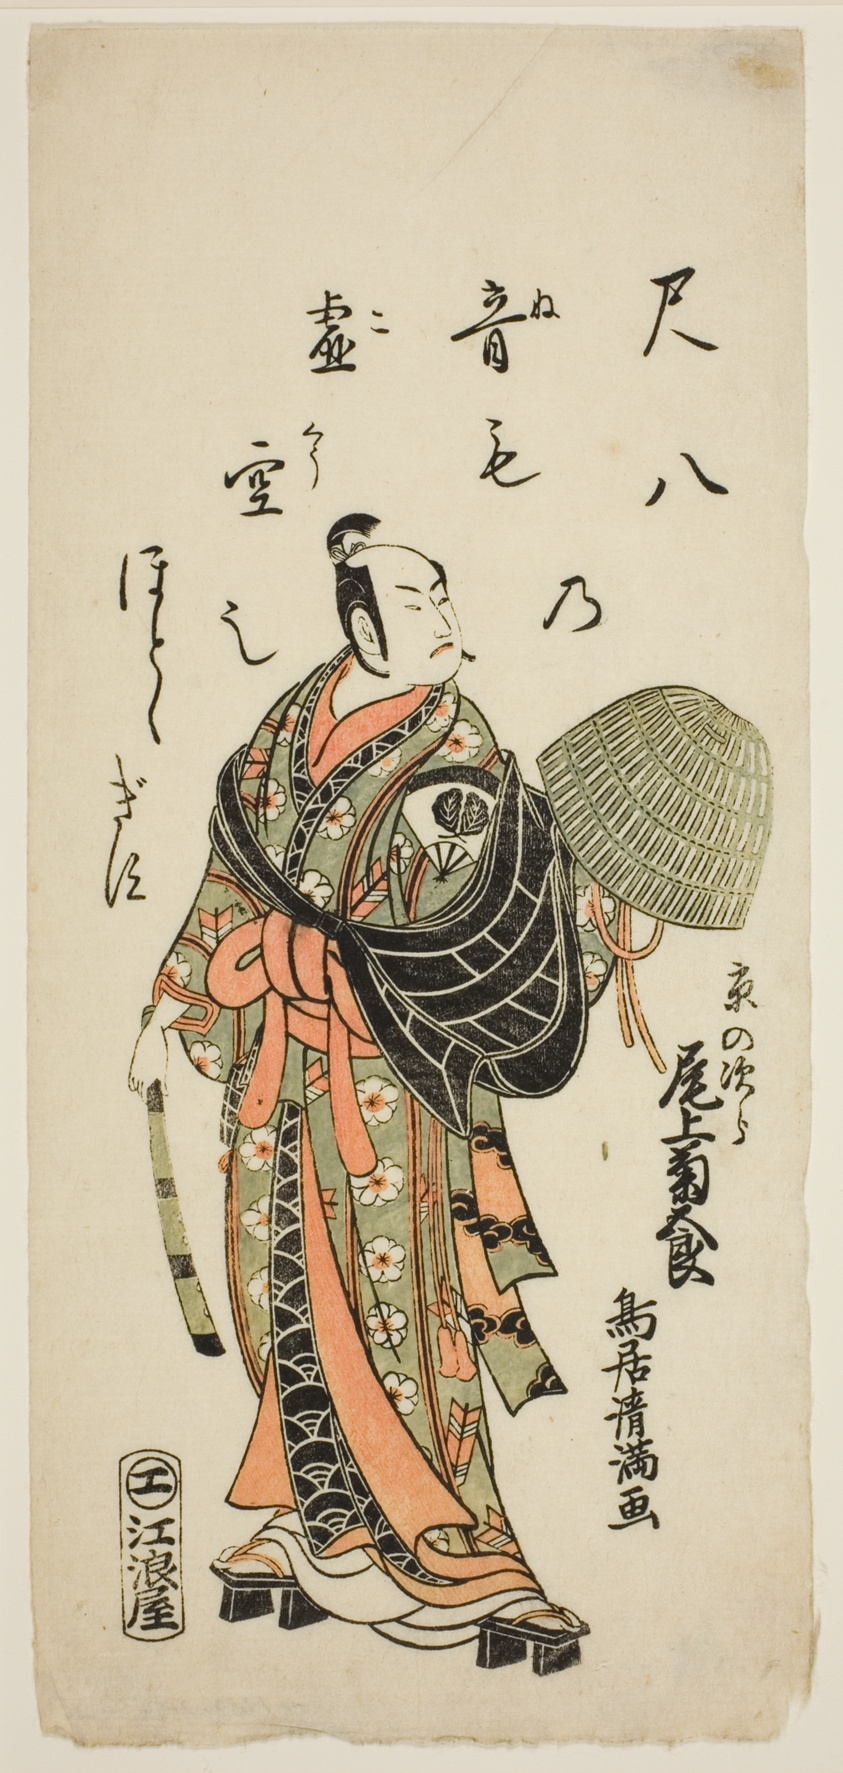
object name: Print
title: The Actor Onoe Kikugoro I as Kyo no Jiro in the play "Fujibumi Sakae Soga," performed at the Ichimura Theater in the second month, 1763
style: Japanese (culture or style)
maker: Torii Kiyomitsu I (Japanese, 1735–1785)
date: 1763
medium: Color woodblock print; hosoban, benizuri-e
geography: Japan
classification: woodblock print; print; asian art